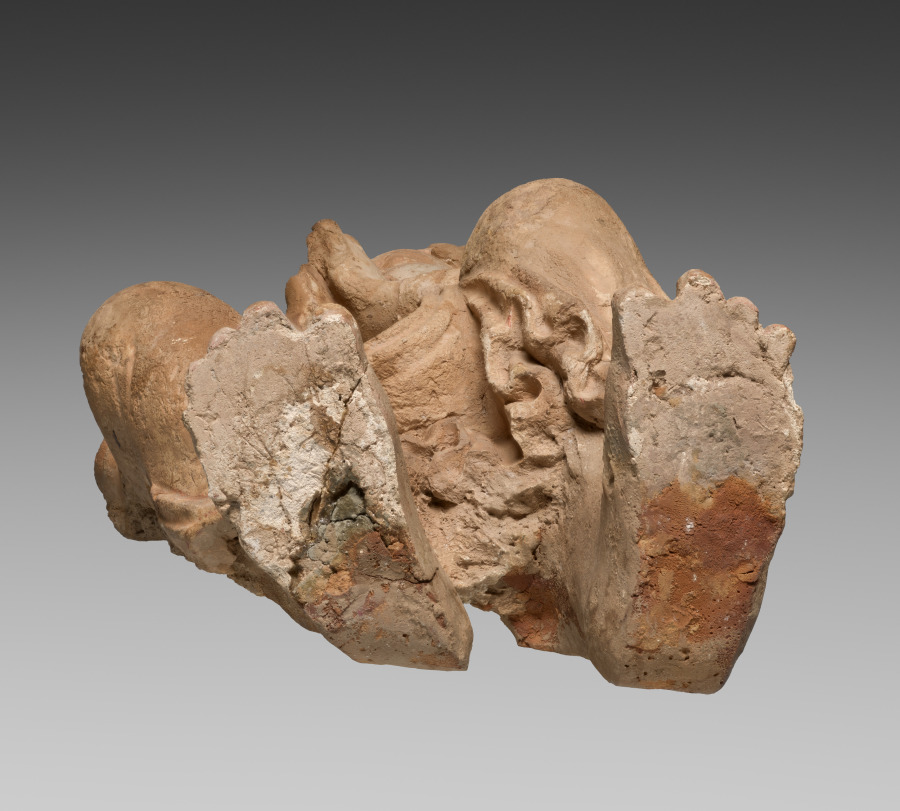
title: Adoring Attendant from a Buddhist Shrine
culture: Afghanistan, Gandhara, Kushan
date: c. 300s–400s CE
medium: stucco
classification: Sculpture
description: The medium of stucco became popular after the 4th century for works made for Buddhist sanctuaries, especially in the desert regions of Afghanistan where stone was less available. The more malleable material allowed sculptors to create sensitive and supplely modeled forms. The stucco sculptures were covered with a thin coat of lime-based whitewash, then painted; traces of original red pigment remain in some areas.